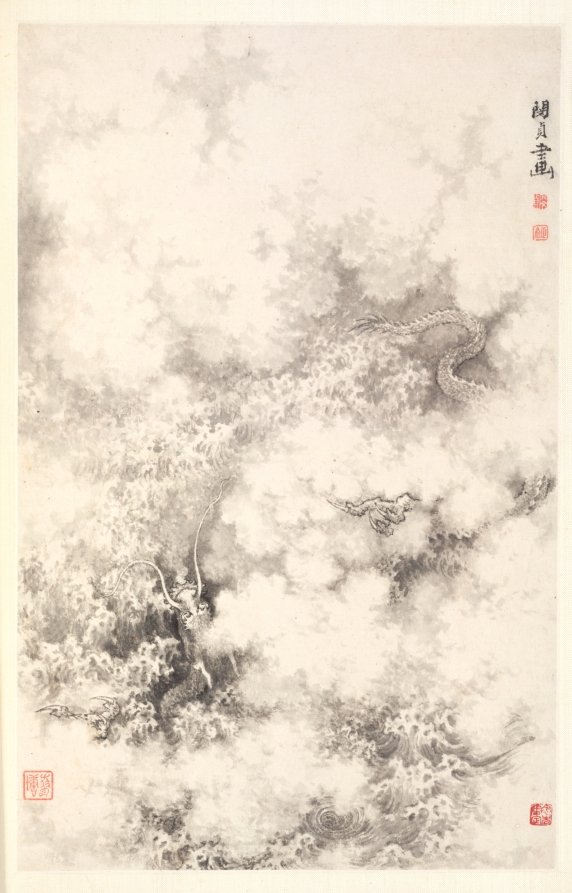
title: Dragon amid Clouds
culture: China, Qing dynasty (1644-1911)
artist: Min Zhen (Chinese, 1730–after 1788)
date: 1788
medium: album leaf, ink on paper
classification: Painting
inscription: Inscription by Min Chen on the last leaf: I have a habit of collecting strange rocks. My friend Tai-li shan-jen* treasures my paintings as much as I treasure strange rocks. Once we agreed to exchange what we love with each other. However, my busy activities have kept me from carrying this out. This summer I realized that this strange rock has been sitting in my studio for five years, so I painted this to fulfill my old promise. As a record, I chose the grotesque cliff in the last scene of this twelve-leaf album. Cheng-chai, Min Chen inscribed this on the sixth day of the sixth month [July 9] of the wu-shen year [1788]. * Tai-li shan-jen is Wang Li [tzu: Li-fu] tr. Hou-mei Ishida Six seals appearing on the leaves: Min Chen, Cheng-chai, Ching-ch'iao, Chen, Liao-t'ang, Min Chen chih-yin.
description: Min Zhen, who was orphaned at age 12 and developed an eccentric personality, was trained by Tang Yin (1682–1756), a writer, playwright, and superintendent of the imperial porcelain workshops in Jingdezhen. The connection to him may have enabled Min to stay in Beijing for a decade from around 1773. It is not clear whether he ever resided in Yangzhou, but his style is in many instances reminiscent of that of Yangzhou artist Huang Shen. This album demonstrates Min’s versatility and mature style in the last years of his life.